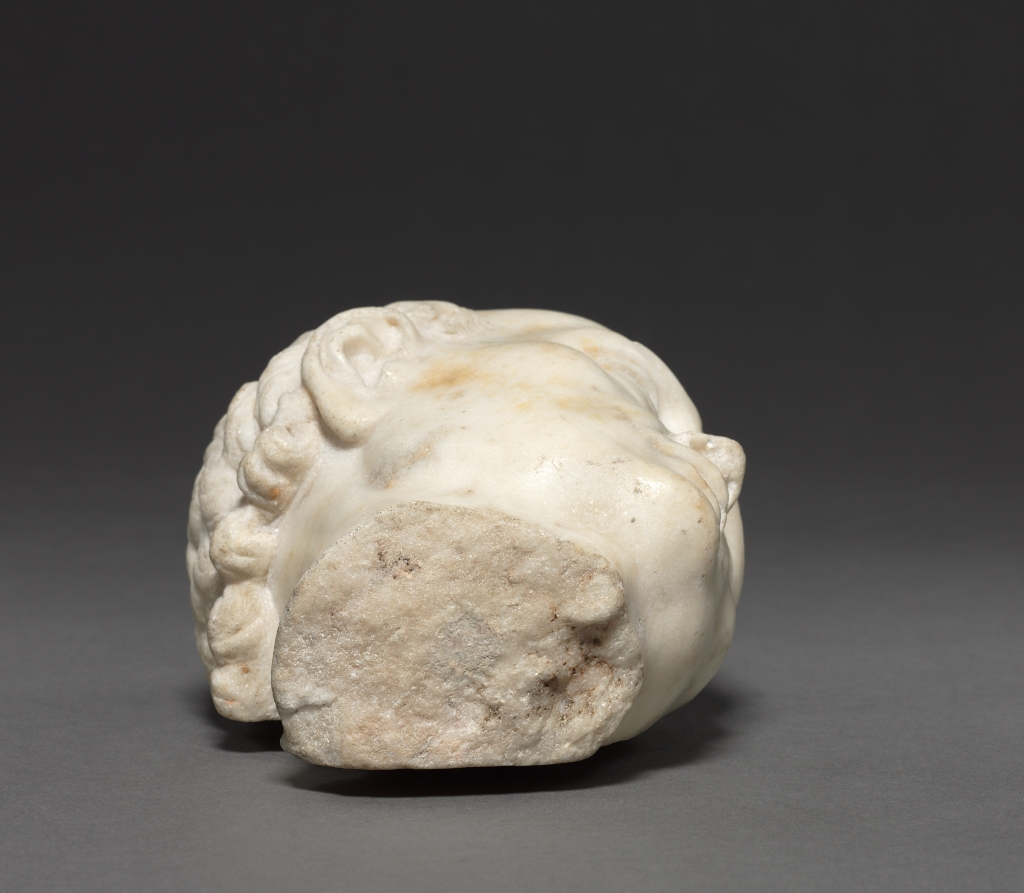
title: Head of a Man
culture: France, 15th century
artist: circle of Michel Colombe (French, c. 1430–c. 1513)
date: 1520–1525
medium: marble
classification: Sculpture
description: The original context and function of these two marble heads are unknown. They are presumed to have been part of a relief sculpture from a château, perhaps in the Loire region, or else from a tomb sculpture. Their style is reminiscent of sculptures produced by Michel Colombe, a prominent sculptor active in the Loire Valley in the service of aristocratic and royal patrons, and may have been carved by a close follower or member of his workshop.